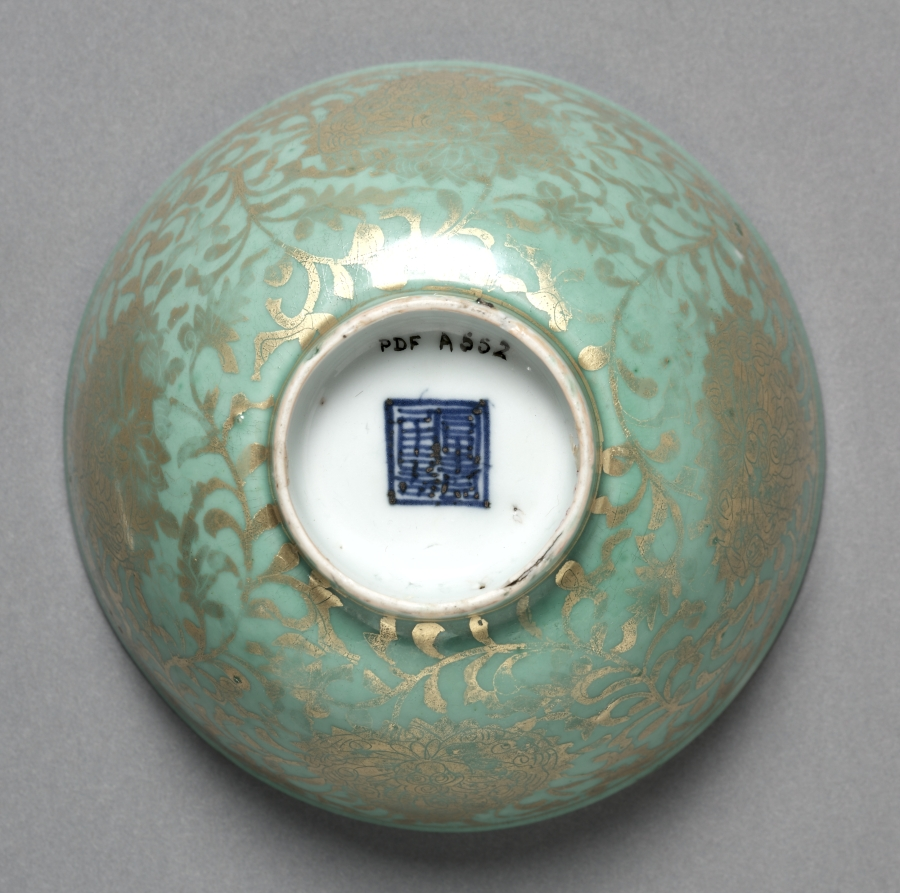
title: Bowl with Lotus Scrolls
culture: China, Jiangxi Province, Jingdezhen kilns, Ming dynasty (1368–1644)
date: 1500s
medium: porcelain with burnished and engraved gold (kinrande) decoration on green overglaze enamel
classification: Ceramic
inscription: Fine vessel for the rich and honorable (fugui jiaqi)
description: Bowl such as this, with kinrande (gold-engraved) decoration over monochrome enamels, may have been made originally for export to Japan. On the base of this bowl are an underglaze blue inscription, reading "Fine vessel for the rich and honorable (fugui jiaqi)," as well as a modern registration mark "PDF A552" to indicate that it was formerly in the Sir Percival David collection in London. A similar kinrande bowl can be found in the Percival David Foundation, PDF A549.